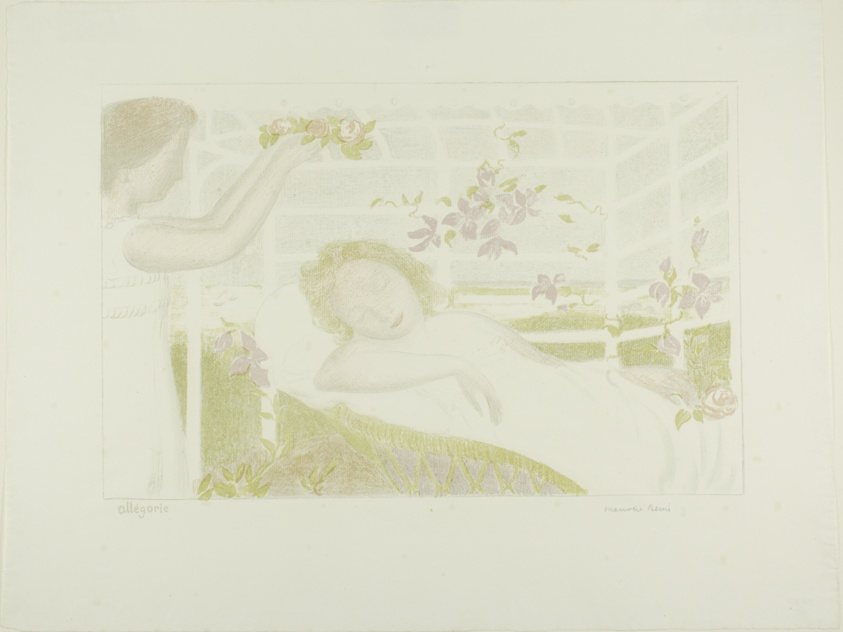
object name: Print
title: Allegory, plate one from Love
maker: Maurice Denis (French, 1870-1943); published by Ambroise Vollard (French, 1867-1939)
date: 1898, published 1899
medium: Lithograph in green, light gray, pink, and purple on light ivory wove paper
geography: France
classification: lithograph; print; prints and drawing